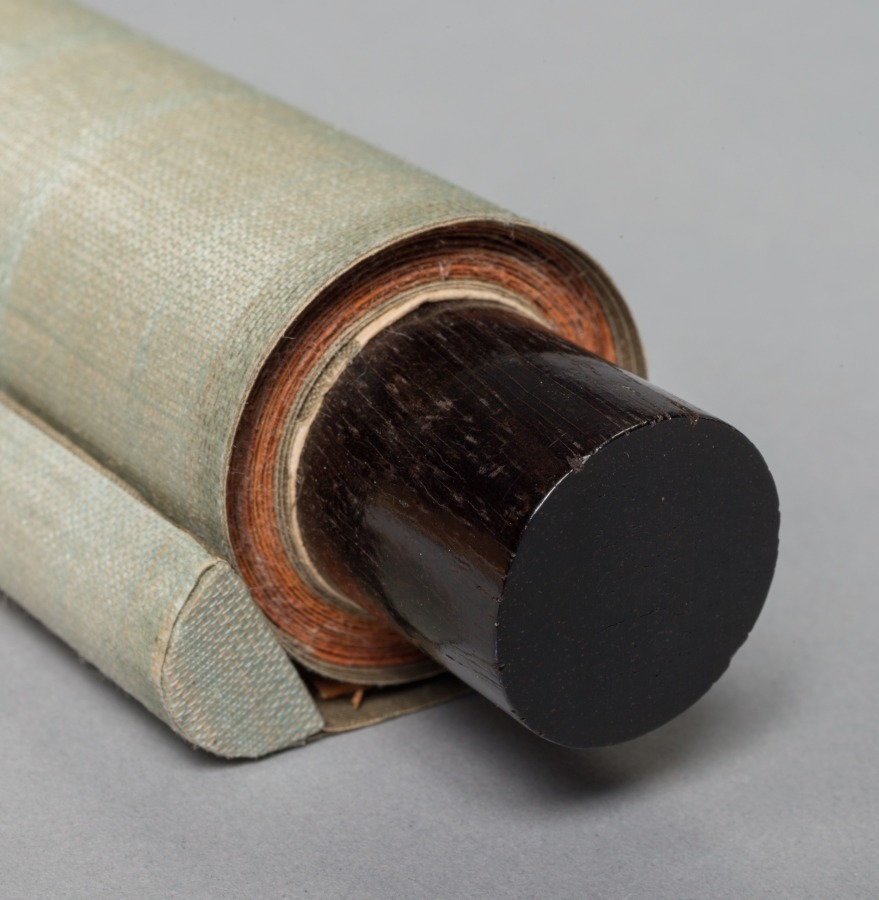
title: Shomen Kongo: The Blue-Faced Kongo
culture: Japan, Edo period (1615–1868)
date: 1615–99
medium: hanging scroll; ink and color on paper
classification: Painting